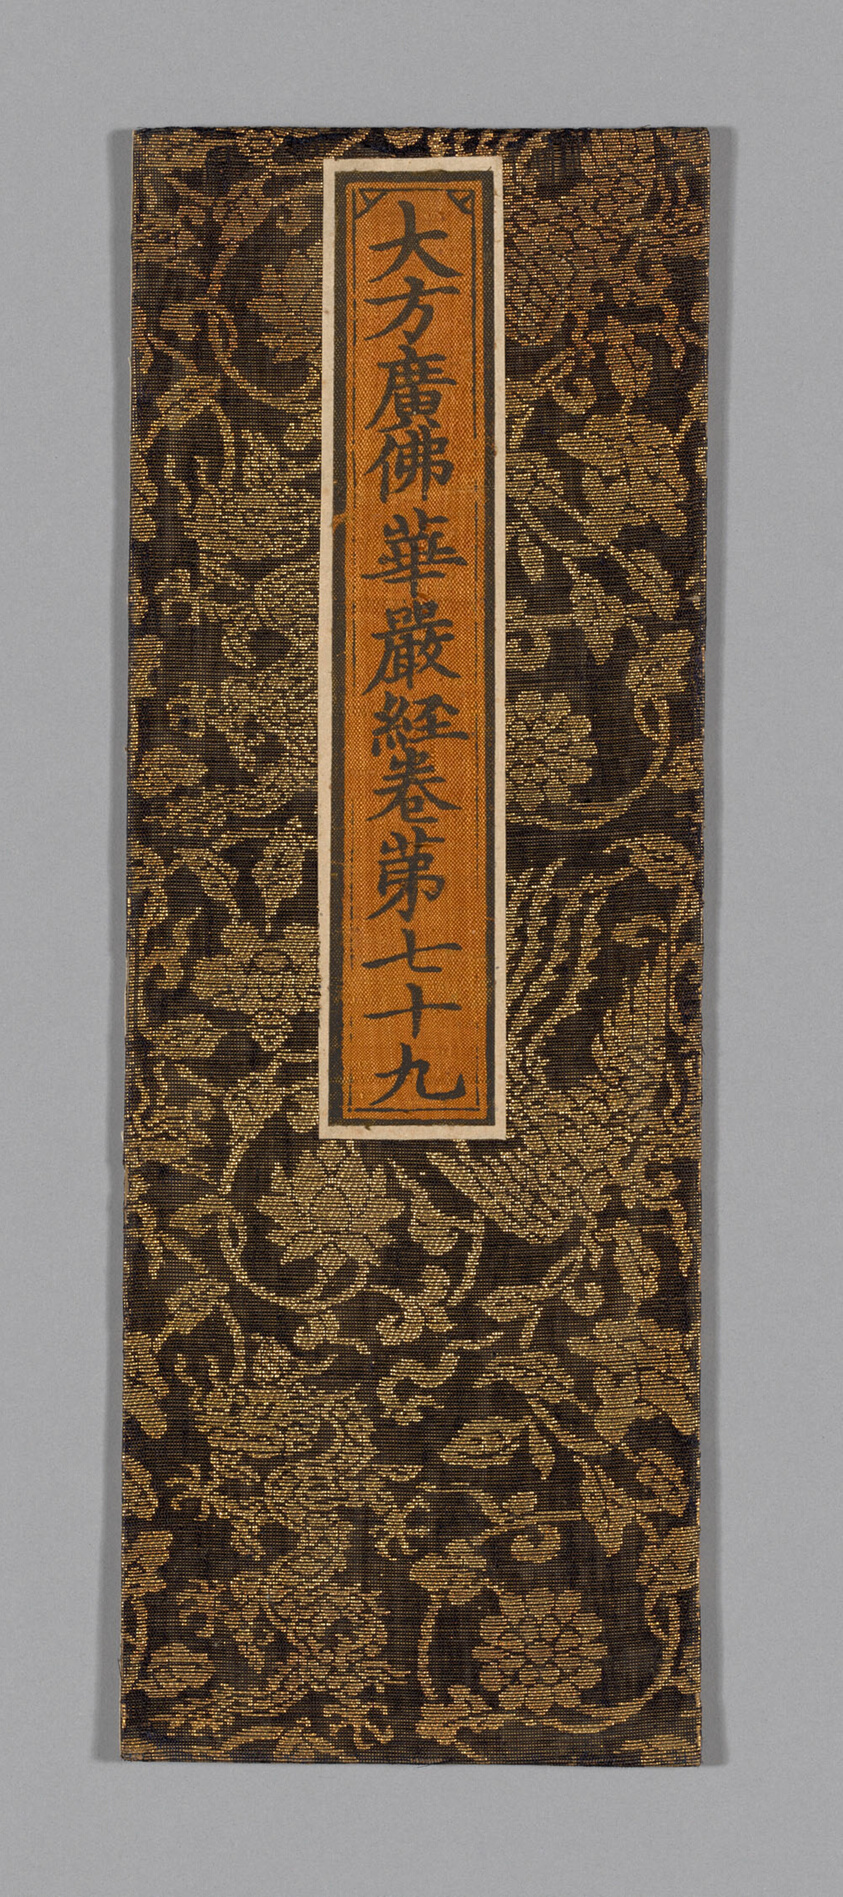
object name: Textile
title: Sutra Cover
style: ming, Chinese (culture or style), East Asian, asian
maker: China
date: Ming dynasty (1368–1644), c. 1590's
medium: Silk and gold-leaf-over-lacquered-paper strip, plain weave with supplementary patterning wefts bound in weft-float faced 1:3 'Z' twill interlacings; label: silk, plain weave; painted with ink, glued over paper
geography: China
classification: textile; weaving